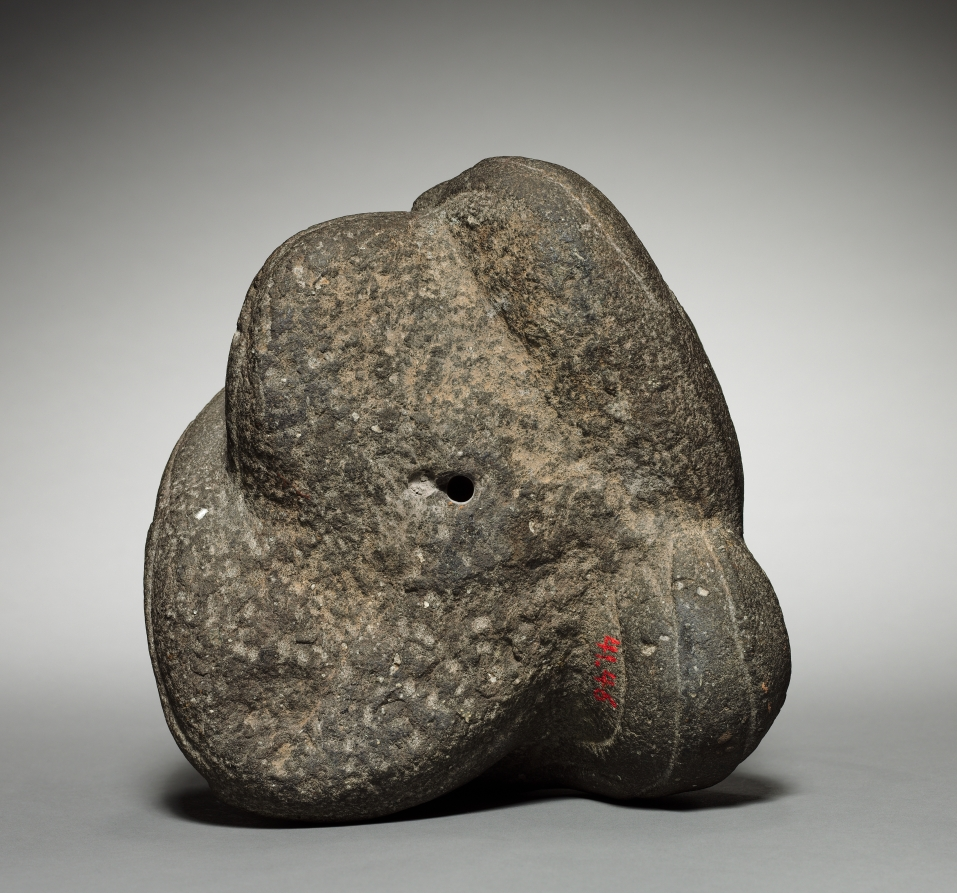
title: Feathered Serpent (Quetzalcoatl)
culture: Central Mexico, Aztec or modern, Post-Classic Period or modern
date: 1325–1521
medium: stone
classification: Stone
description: The museum bought this sculpture in 1941, when study of ancient American arts was in its infancy. It has many odd features, a few perhaps revealing an attempt to make the subject—the Aztec deity Quetzalcoatl (Feathered Serpent)—palatable to modern viewers. But it cannot absolutely be declared fake because some real Aztec sculptures are unusual. Analysis of the surface so far provides no help. Especially odd is the arrangement of the coils into bulges that suggest the pectorals, knees, and buttocks of a human body, as though the sculpture represents a human in a serpent costume. Real Aztec sculpture usually portrays the serpent's dangerous body more realistically. Also, the mouth mask—the insignia of a wind deity related to Quetzalcoatl and, thus, perhaps appropriate—is much larger in genuine sculptures. This suggests that, because the mask and its authentic proportion are strange to our eyes, a forger scaled it down. Other uncommon features include the incomplete carving of the ears, the fact that the human head does not emerge from a serpent's mouth, and more.